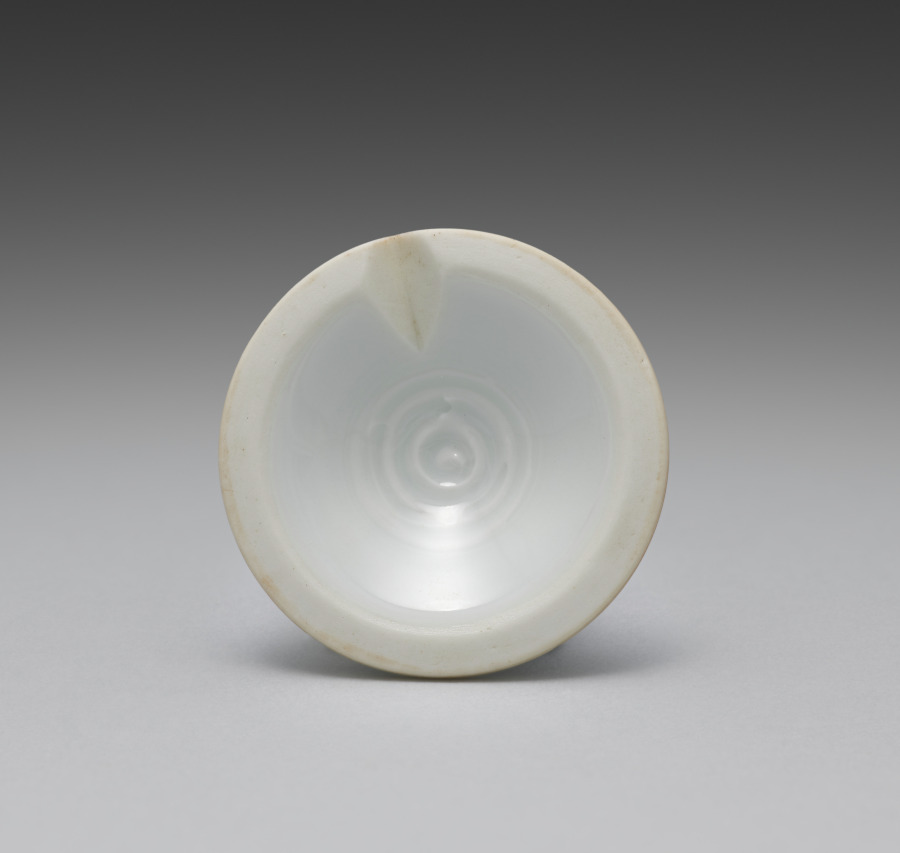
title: Lid for a Teapot from Tea Set with Chinese Landscape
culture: Japan, Meiji period (1868–1912)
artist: Seifū Yohei III (Japanese, 1851–1914)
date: 1893–1914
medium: Porcelain with underglaze blue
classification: Ceramic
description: This tea set with idyllic lakeside Chinese landscapes has a side-handled pot called a kyūsu, used for steeping, straining, and serving tea. Unlike some others, this set also has a yuzamashi, a container used to cool boiled water to just the right temperature for the best flavor when steeping. Seifū Yohei III’s painting teacher, Tanomura Chokunyū (1814–1907), made a visual record of famous sencha events that shows how these kinds of porcelains fit with objects such as a stove and kettle to form a complete set of utensils for tea preparation, and with ensembles of decorative objects meant to inspire creativity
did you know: The teapot depicts two friends playing a board game on a promontory beyond a two-storied residence, while another figure comes across the entry bridge bearing bags of provisions, hung from the ends of a pole balanced across his shoulders.